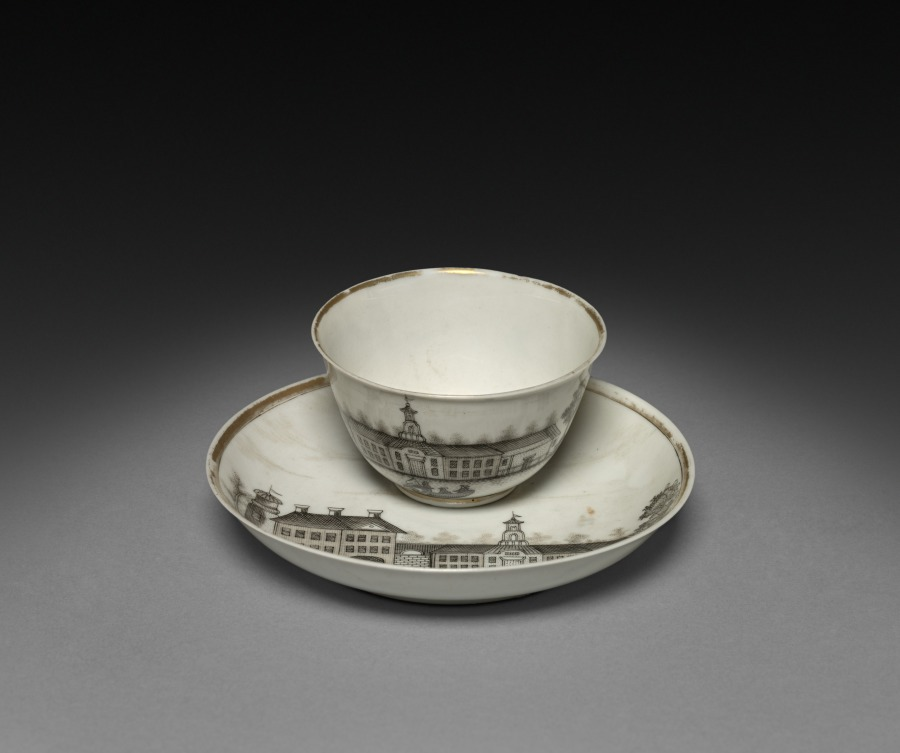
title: Tea Bowl and Saucer with View of Town (Cleves?)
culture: China, Chinese Export -- Continental Market, 18th century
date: c. 1770–85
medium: porcelain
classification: Ceramic